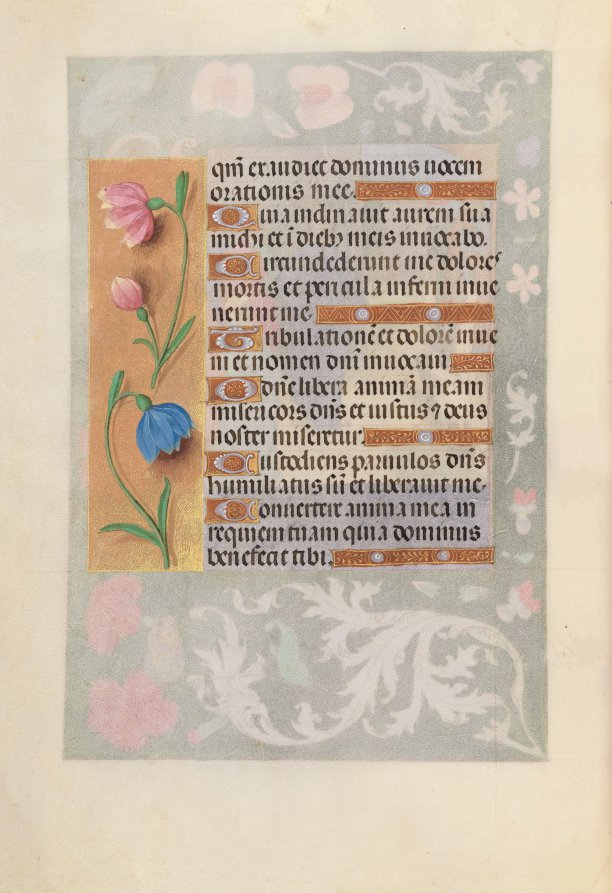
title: Hours of Queen Isabella the Catholic, Queen of Spain: Fol. 220v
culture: Flanders, Ghent and Bruges, late 15th century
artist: Master of the First Prayerbook of Maximillian (Flemish, c. 1444–1519)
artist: and Associates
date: c. 1500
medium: ink, tempera, and gold on vellum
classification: Bound Volume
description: This manuscript was illuminated by a circle of at least five highly organized manuscript painters active in the Flemish cities of Ghent and Bruges. The principal illuminator was Alexander Bening, who painted the majority of the book's miniatures. Manuscripts produced by this circle of artists are renowned for the decoration of their borders, which typically feature a rich variety of realistically-painted flowers, birds, and butterflies. This prayer book, called a book of hours, was intended not for a cleric, but for the private devotions of a lay person-in this case, Isabella the Catholic, Queen of Spain (1451-1504). Isabella's coat of arms embellishes the book's frontispiece. It is unlikely that the book was commissioned by the Queen herself; rather, she probably received it as a diplomatic gift from someone courting her patronage, perhaps Cardinal Francisco Jimenez de Cisneros. A Franciscan friar, Jimenez was dependent upon Isabella for his advancement, first to the post of Queen's confessor in 1492, and then to Archbishop of Toledo in 1495.